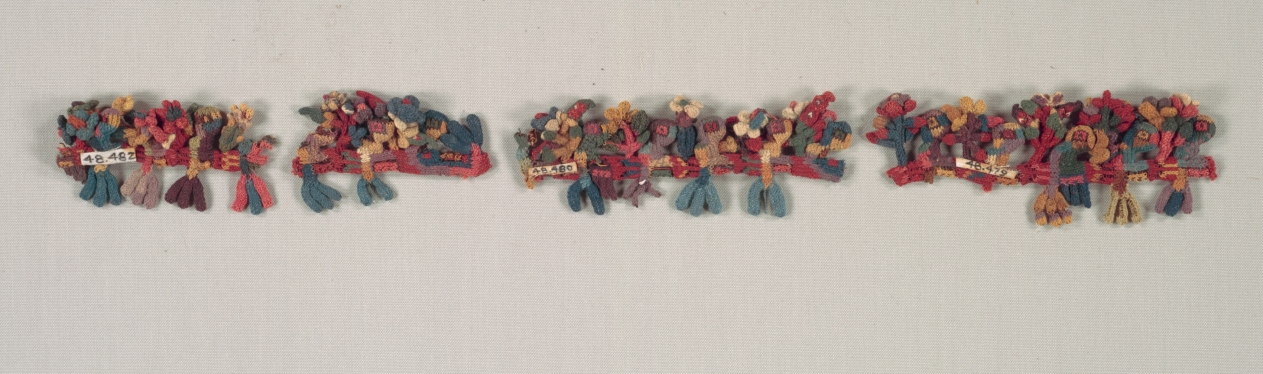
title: Border Fragment with Birds and Flowers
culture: Peru, South Coast, Nasca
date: 100 BCE–700 CE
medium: camelid fiber, cross-knit looping (reversible)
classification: Embroidery